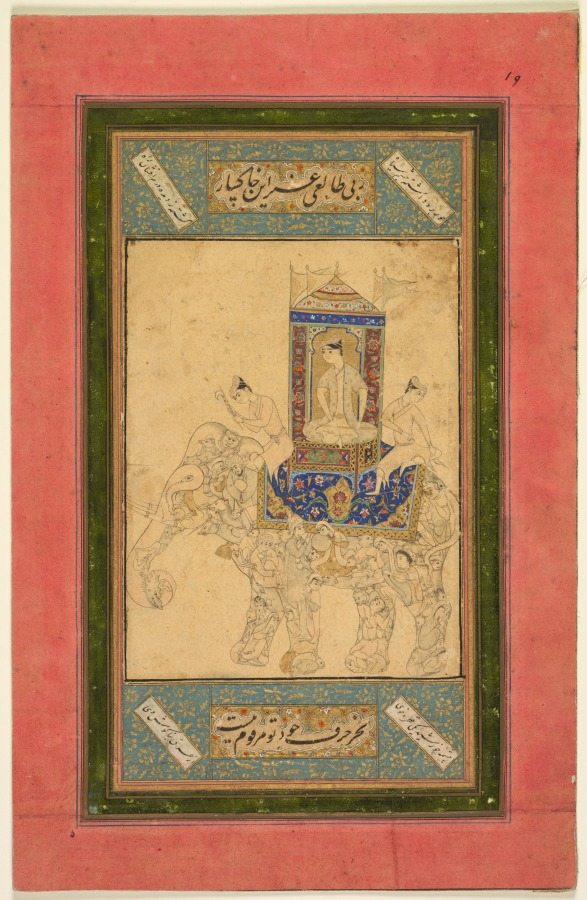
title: A prince riding a composite elephant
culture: India, Golconda, Deccan, 16th century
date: c. 1590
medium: Gum tempera, ink, and gold on paper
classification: Painting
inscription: Inscriptions: Calligraphy of Persian verses in top and bottom borders, in nasta‘liq script: Central verse (half-line on top, the other below the elephant’s feet): Given the foretold lackluster fortune of this abject servant Nothing is writ save words of your bounty Diagonal verses on top: The angelic beauties of paradise with their anxious dark-eyes set on the road Their glances throwing gold coins on the path (as a welcome) Diagonal verses below: The glittering full face of the sun is no more than a single drop From the perspiration behind his ear.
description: A prince sits cross-legged in a covered howdah seat secured to the back of a royal elephant with golden rings on its tusks. The elephant is being driven by attendants, one of whom holds a goad. Artists in the southern Indian region known as the Deccan expanded upon Persian practices of embedding creatures in landscape scenes—like a visual double-entendre—and created inventive images of composite creatures made up of figures that invite extended close looking. This painting would have been mounted in an album that was brought out for entertainment in elite intimate gatherings.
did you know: Two lions share one head at the top of the elephant’s head.